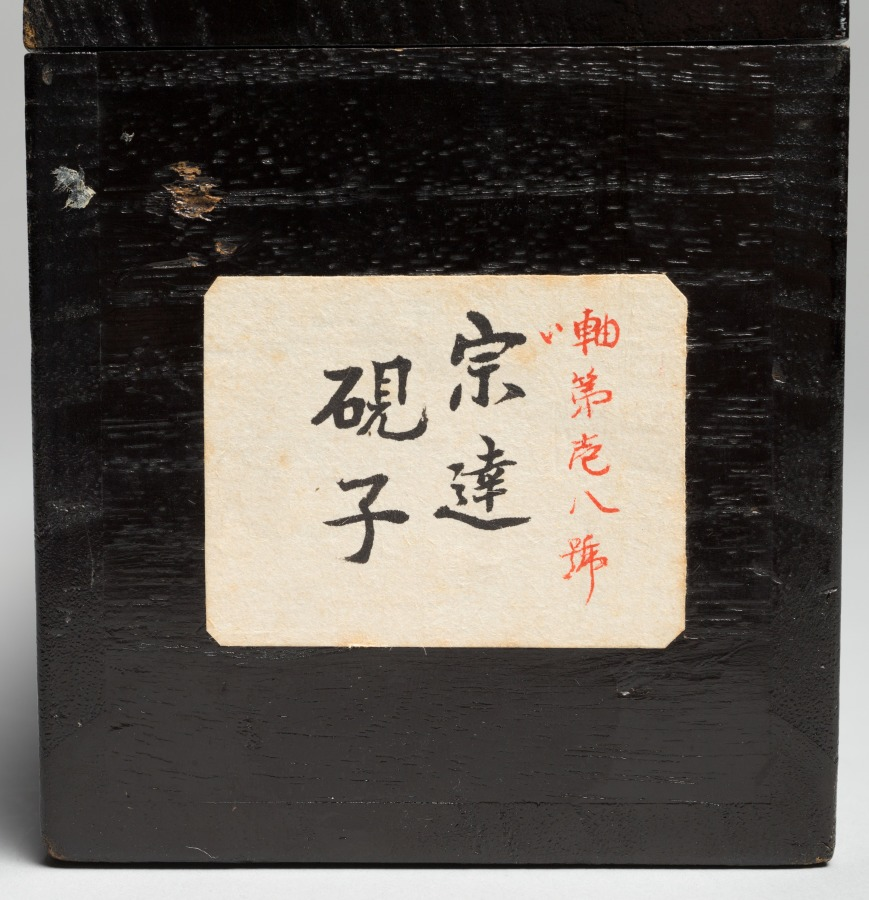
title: Kenshu, Monk with Shrimp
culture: Japan, Edo period (1615–1868)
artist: studio of Tawaraya Sōtatsu (Japanese, c. 1570–c. 1640)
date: c. 1600–1640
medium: hanging scroll; ink on paper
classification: Painting